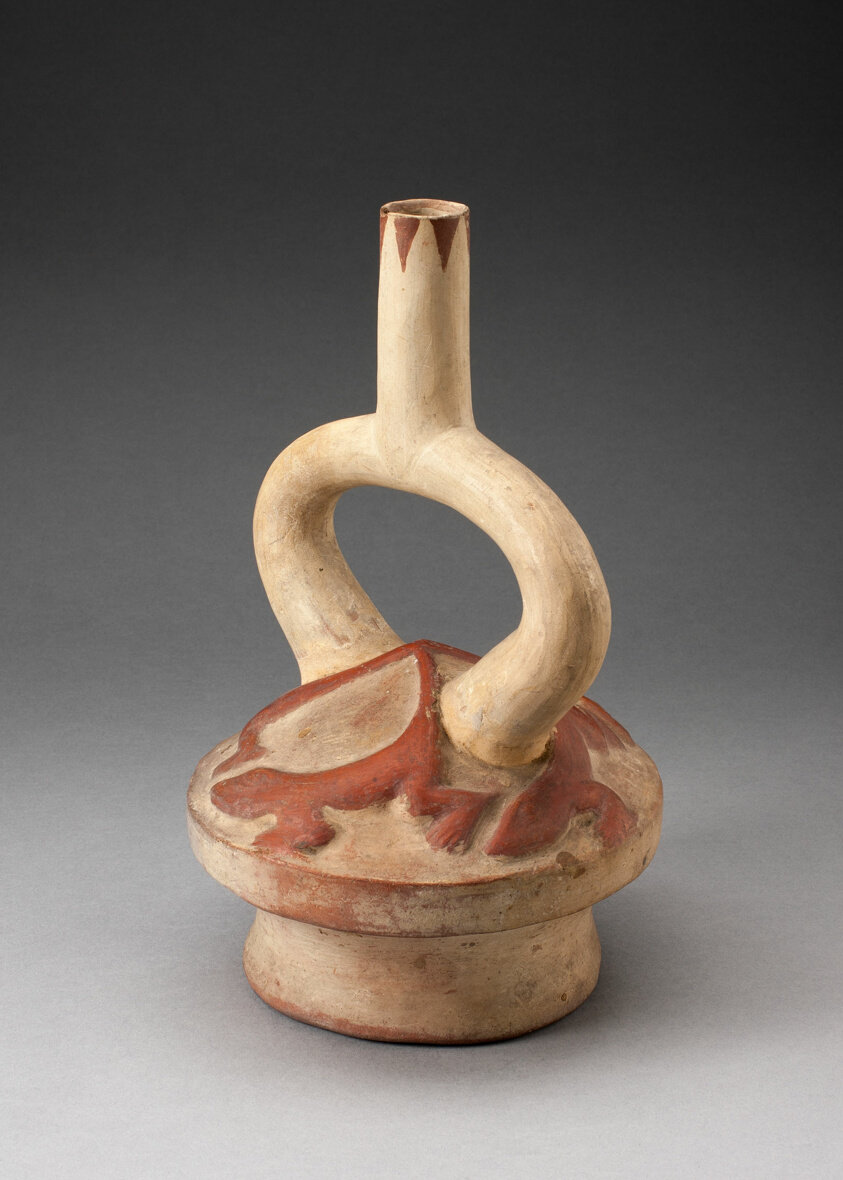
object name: Vessel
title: Stirrup Spout Vessel with Raised Lizard Motifs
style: moche, mochica v, mochica, early intermediate period, Pre-Columbian, americas, Arts of the Americas, andean, andes, south american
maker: Moche (North coast, Peru)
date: 100 BCE–500 CE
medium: Ceramic and pigment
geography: Peruvian North Coast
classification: earthenware; ceramics; vessel; art of the americas